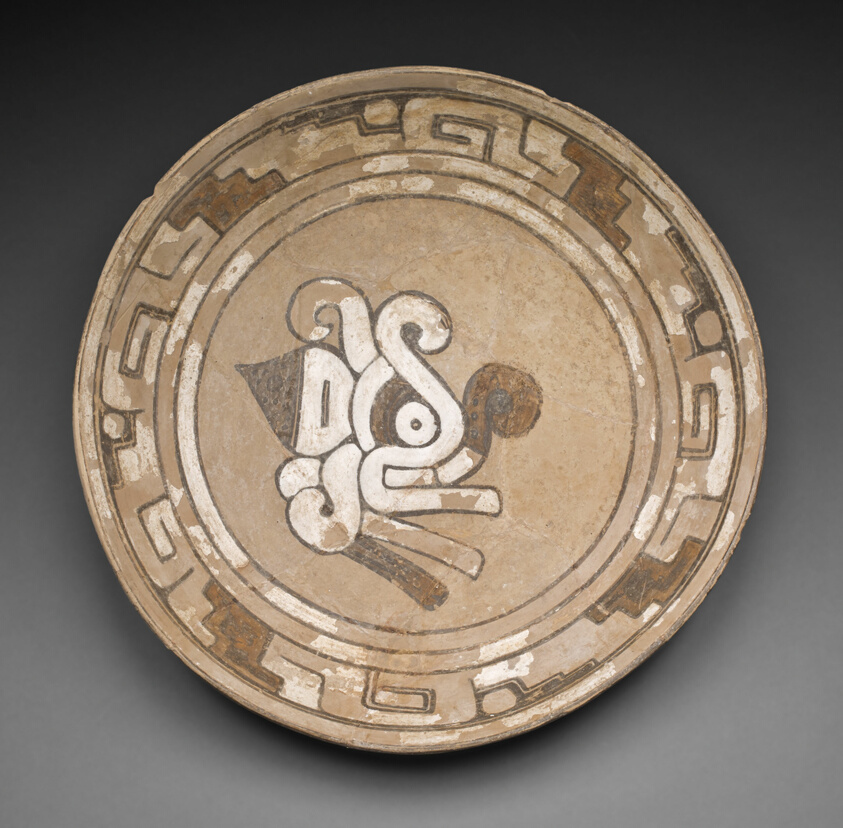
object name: Vessel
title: Plate with an Image of a Moth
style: huastec, classic veracruz, mesoamerican, Pre-Columbian, americas, Arts of the Americas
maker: Huaxtec; Isla de Sacrificios, Veracruz, Mexico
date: 900–1200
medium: Ceramic and pigment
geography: Veracruz state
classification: earthenware; art of the americas; ceramics; vessel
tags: moth, insects, abstract figures, geometric